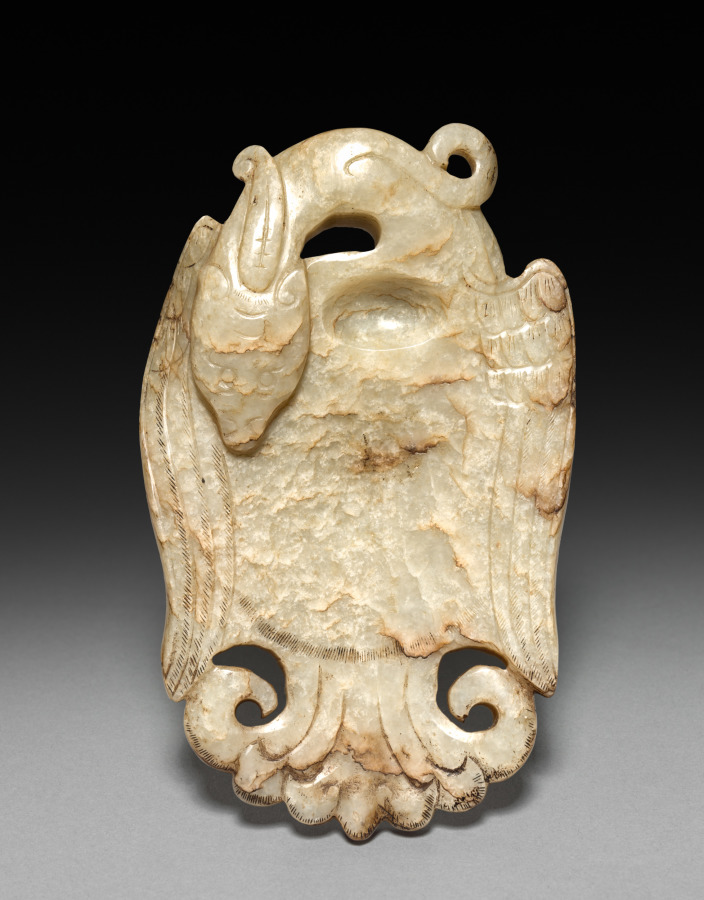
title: Bird Shaped Ink Stone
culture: China, Ming dynasty (1368-1644) ?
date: 1368–1644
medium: jade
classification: Jade